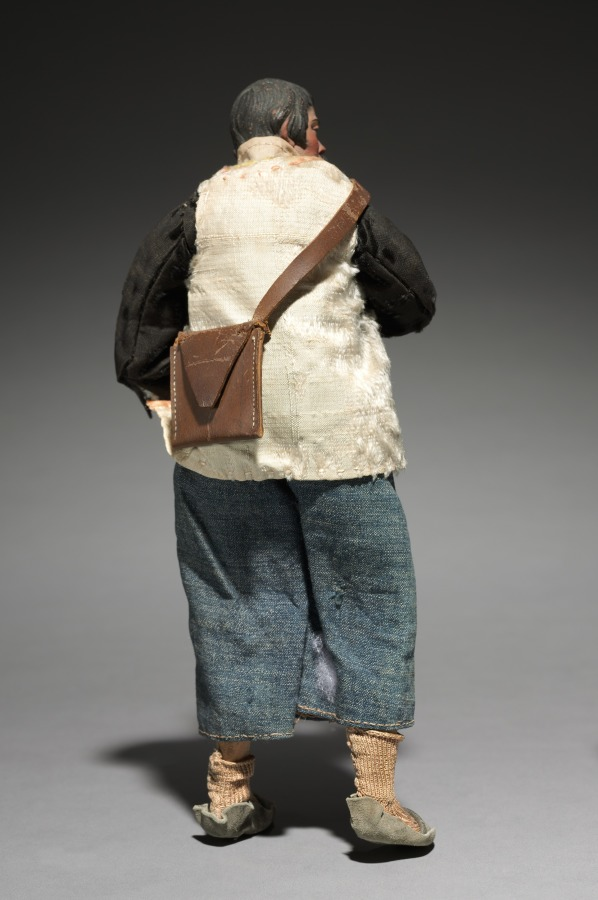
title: Figure from a Crèche: Standing Man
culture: Italy, Naples, late 18th-early 19th century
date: 1780–1830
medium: painted wood and terracotta with various textiles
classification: Sculpture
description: The practice of creating scenes of the Nativity for the home dates from the early 1700s in Italy, where people began to set up doll-like figures of about a foot or less in height. The custom was particularly popular in Naples around 1800, where crèche scenes (crèche means cradle, or crib) included many figures, whose heads and hands of painted terracotta, stuffed cloth bodies, and clothing adapted from contemporary local costumes gave them an amazingly realistic character. Representations of the birth of Jesus can be traced to the first few centuries of Christianity. Both living creatures and sculptural depictions of them were used from early times. By the late middle ages it was customary to create life-size figures of wood or stone, naturalistically painted, to represent the characters who participated in the events of Jesus's early life. These sculptures were then arranged in scenes illustrating one or both of the most important of these events, the Adoration of the Shepherds and the Adoration of the Magi-the three kings from the East who came to pay homage to the Christ child. Used in churches, these large figures were especially popular in Italy, Central Europe, Spain, and Portugal.